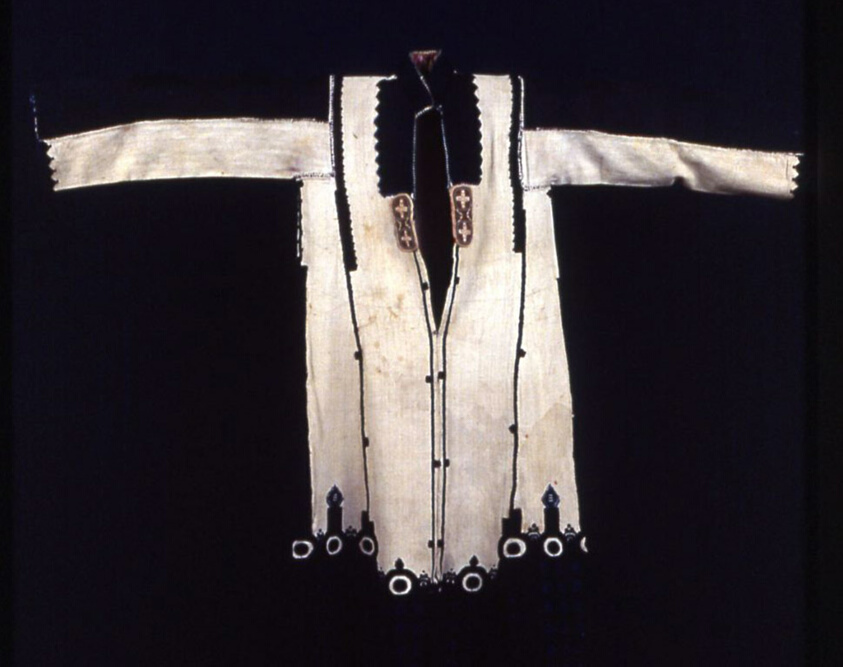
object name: Costume and Accessories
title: Woman's Dress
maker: Probably Greek Islands or Eastern Europe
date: 1700/1900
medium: Cotton, plain weave; embroidered with wool and cotton in buttonhole, chain, closed herringbone, cross, overcast, satin, stem, whipped stem, and twined double running stitches; couching; appliquéd medallions of wool, plain weave; fulled; embroidered with cotton and gilt-metal-strip-wrapped cotton in buttonhole, chain, and satin stitches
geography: Eastern Europe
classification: textile; costume; needlework - costume; needlework (visual works)